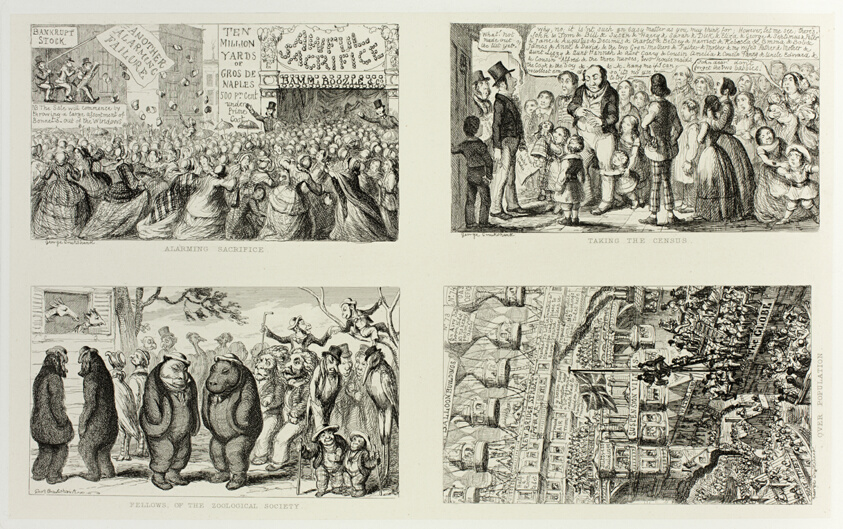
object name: Print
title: Alarming Sacrifice from George Cruikshank's Steel Etchings to The Comic Almanacks: 1835-1853 (top left)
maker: George Cruikshank (English, 1792-1878); published by Pickering & Chatto (English, 19th century)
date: 1851, printed c. 1880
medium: Four steel etchings in black on cream India paper, laid down on off-white card (chine collé)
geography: England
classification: etching; paper; print; prints and drawing